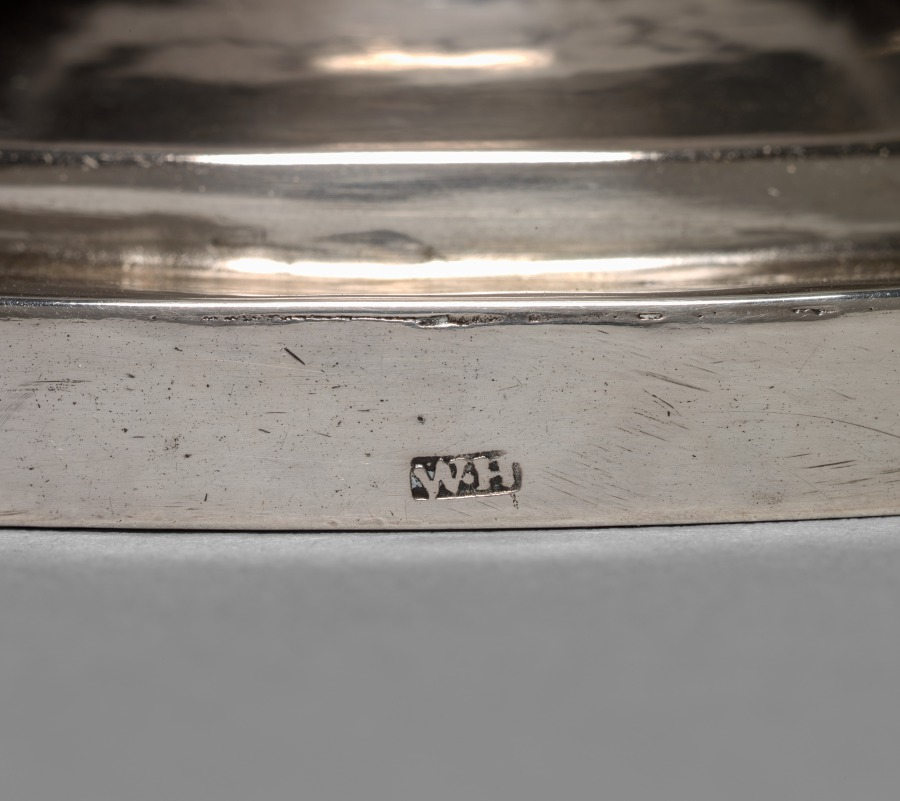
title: Cream Jug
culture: America, Pennsylvania, Philadelphia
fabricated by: William Haverstick (American, 1756–1823)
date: c. 1800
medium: silver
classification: Silver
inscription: engraved "MP" in bright-cut script on side to right of handle.